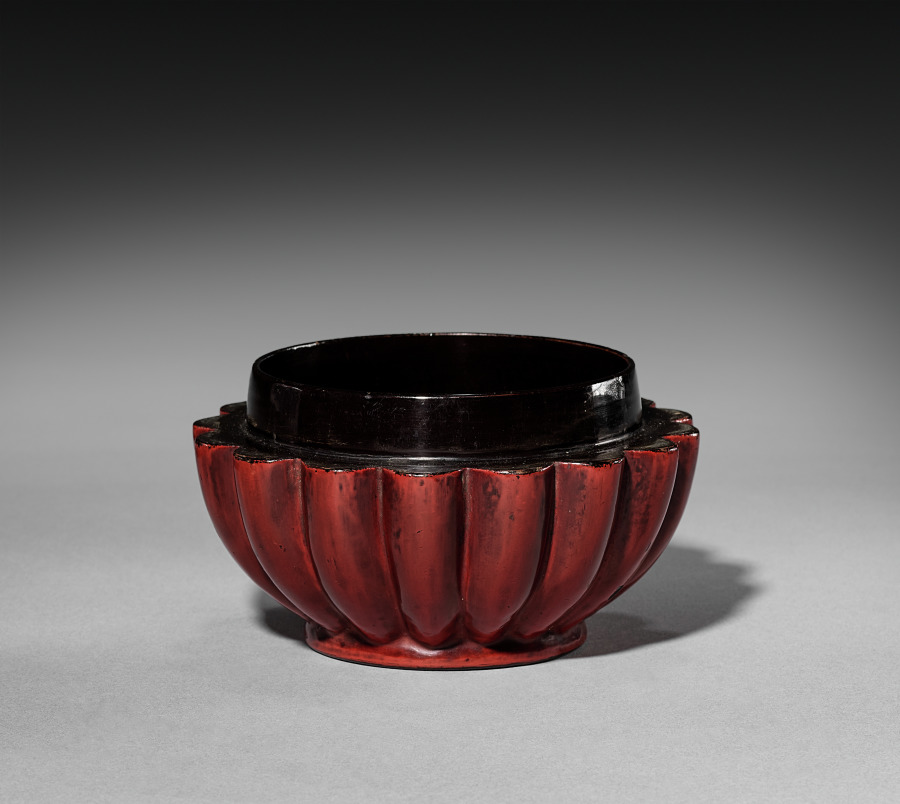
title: Tea Caddy (Chaire)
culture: Japan, Muromachi period (1392–1573)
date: 1500s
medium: Negoro lacquer on wood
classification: Lacquer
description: Negoro is a lacquer technique, named after the Negoro temple in Japan, in which several layers of red lacquer are applied over a black lacquer undercoating. Through years of handling, a natural surface of red and black random patterns emerges, an aesthetic highly prized by the Japanese.